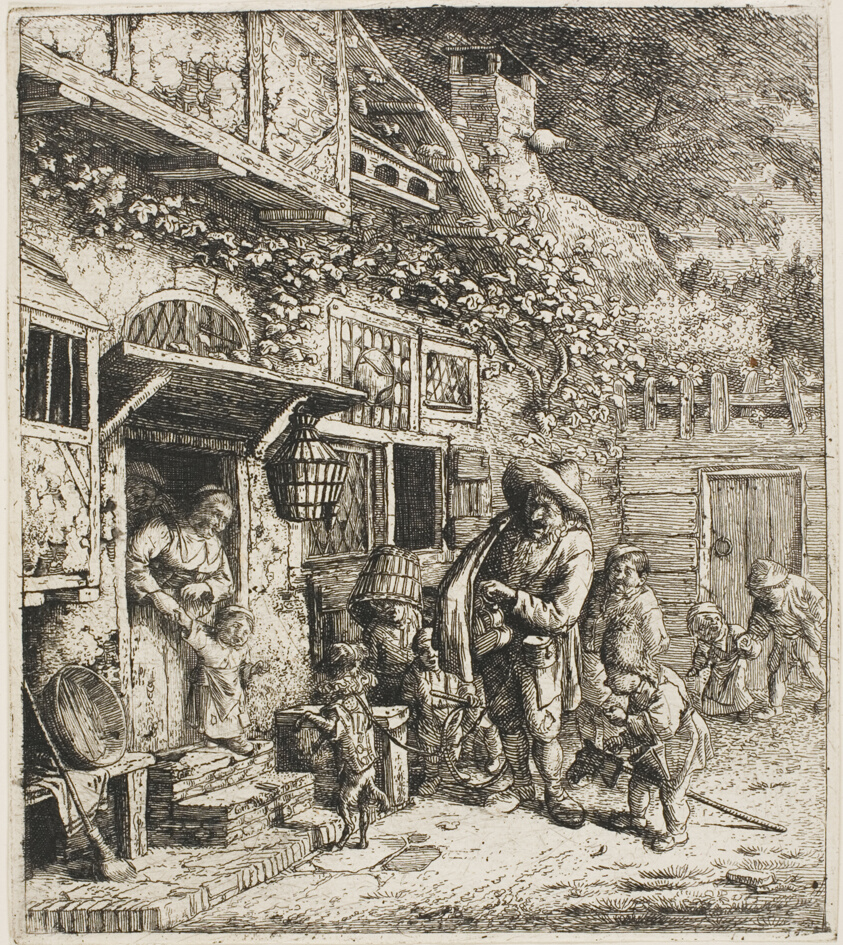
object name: Print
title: The Dancing Dog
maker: Cornelis Dusart (Dutch, 1660-1704)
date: 1685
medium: Etching on cream laid paper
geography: Holland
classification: etching; print; prints and drawing